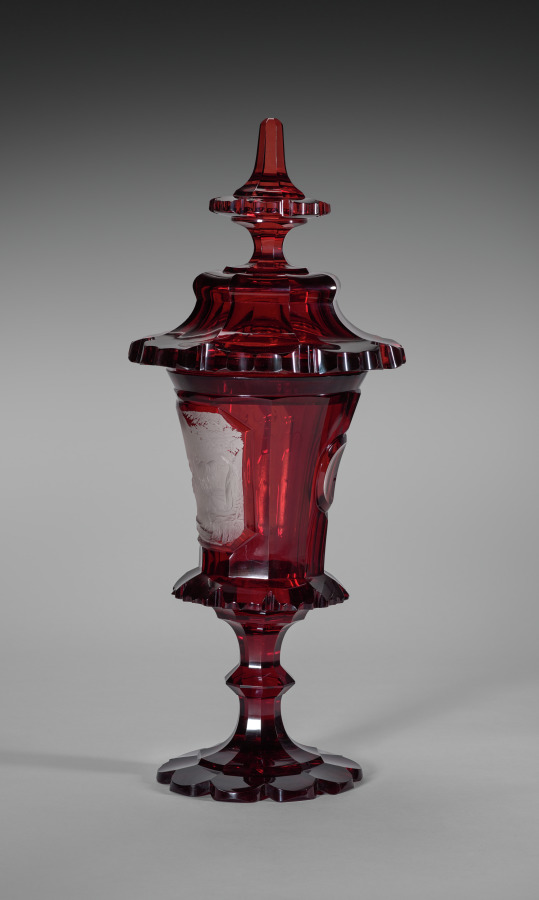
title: Covered Cup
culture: Bohemia, 19th century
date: mid-1800s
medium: ruby glass with engraved decoration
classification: Glass